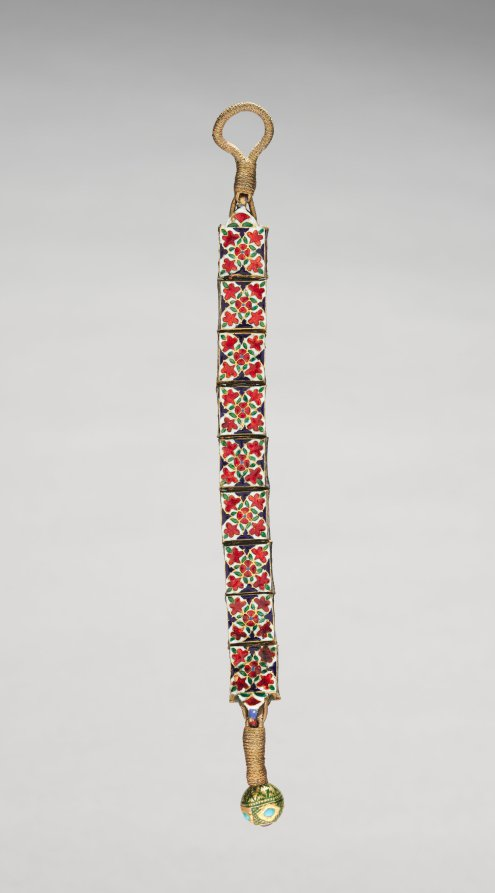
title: Armlet of bazuband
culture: India, Punjab, 18th-19th Century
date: 1700s-1800s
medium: gold, encrusted enamel and gems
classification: Jewelry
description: The gems symbolize the nine planets believed to control human destiny.